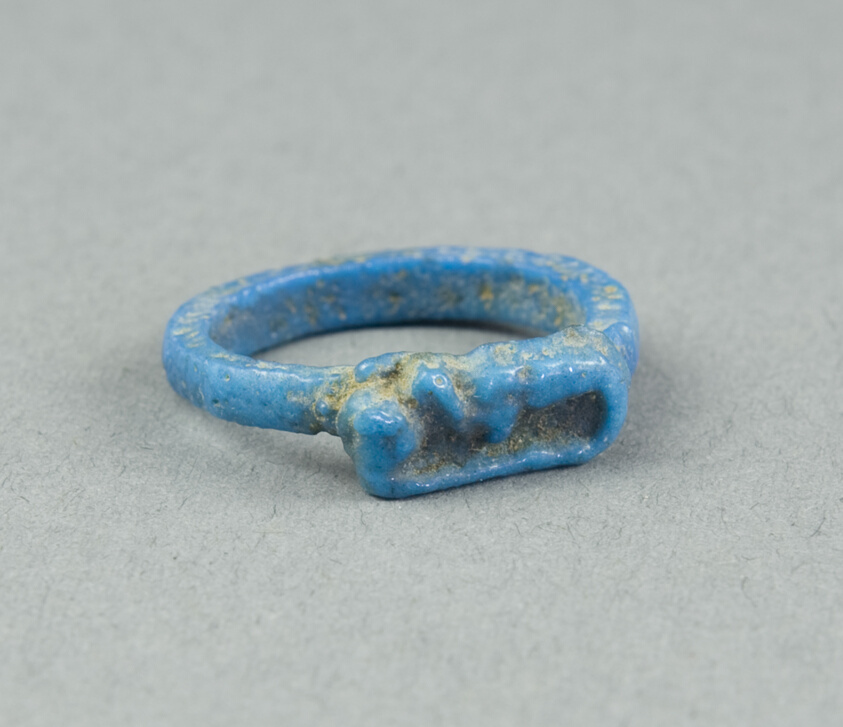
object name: Costume and Accessories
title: Ring: Figure of Serpent Uto (?)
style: egyptian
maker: Egyptian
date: New Kingdom, Dynasty 18 (about 1390 BCE)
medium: Faience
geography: Egypt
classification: ring (jewelry); ceramics; jewelry; ancient art; costume; faïence (composite material)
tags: goddesses